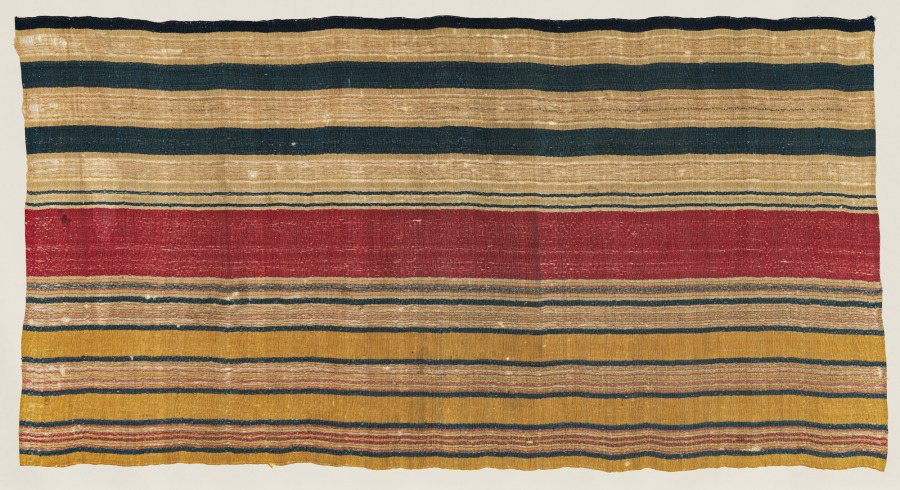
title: Furnishing textile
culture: Africa, North Africa, Morocco, Moroccan weaver(s)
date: 1600s–1700s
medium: Silk, dye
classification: Textile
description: This large, woven silk panel was woven by men in a workshop. It is a furnishing textile, used in the home as a wall hanging or perhaps as a curtain over a doorway or entrance.